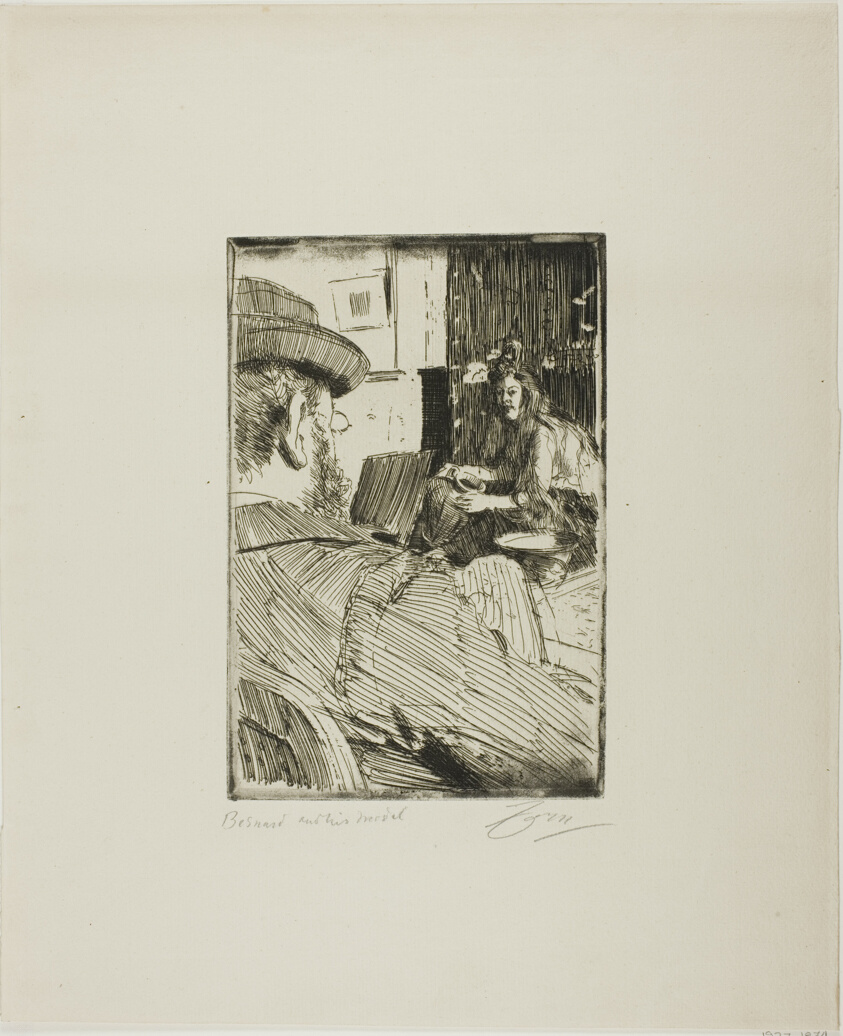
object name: Print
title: Albert Besnard and His Model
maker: Anders Zorn (Swedish, 1860-1920)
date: 1896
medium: Etching on ivory laid paper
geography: Sweden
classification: etching; print; prints and drawing